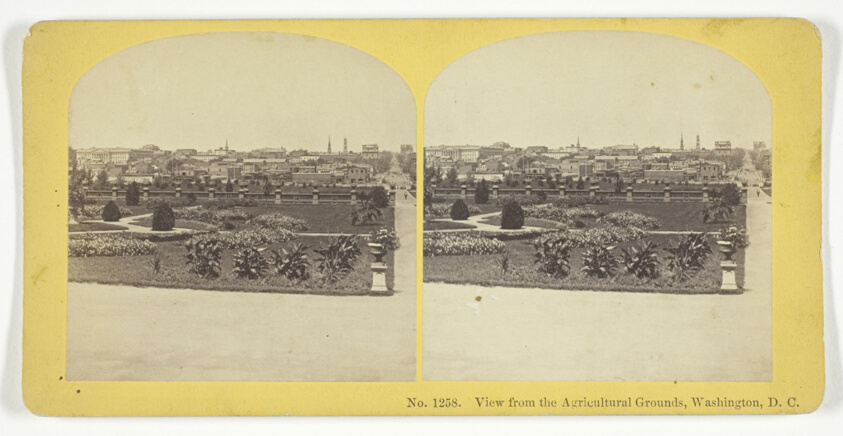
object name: Photograph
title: View from the Agricultural Grounds, Washington, D.C.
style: 19th century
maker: Kilburn Brothers (American, active 1855-1875)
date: 1855/75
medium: Albumen print, stereo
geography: New Hampshire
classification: photography; photograph; albumen silver print; stereograph (albumen)